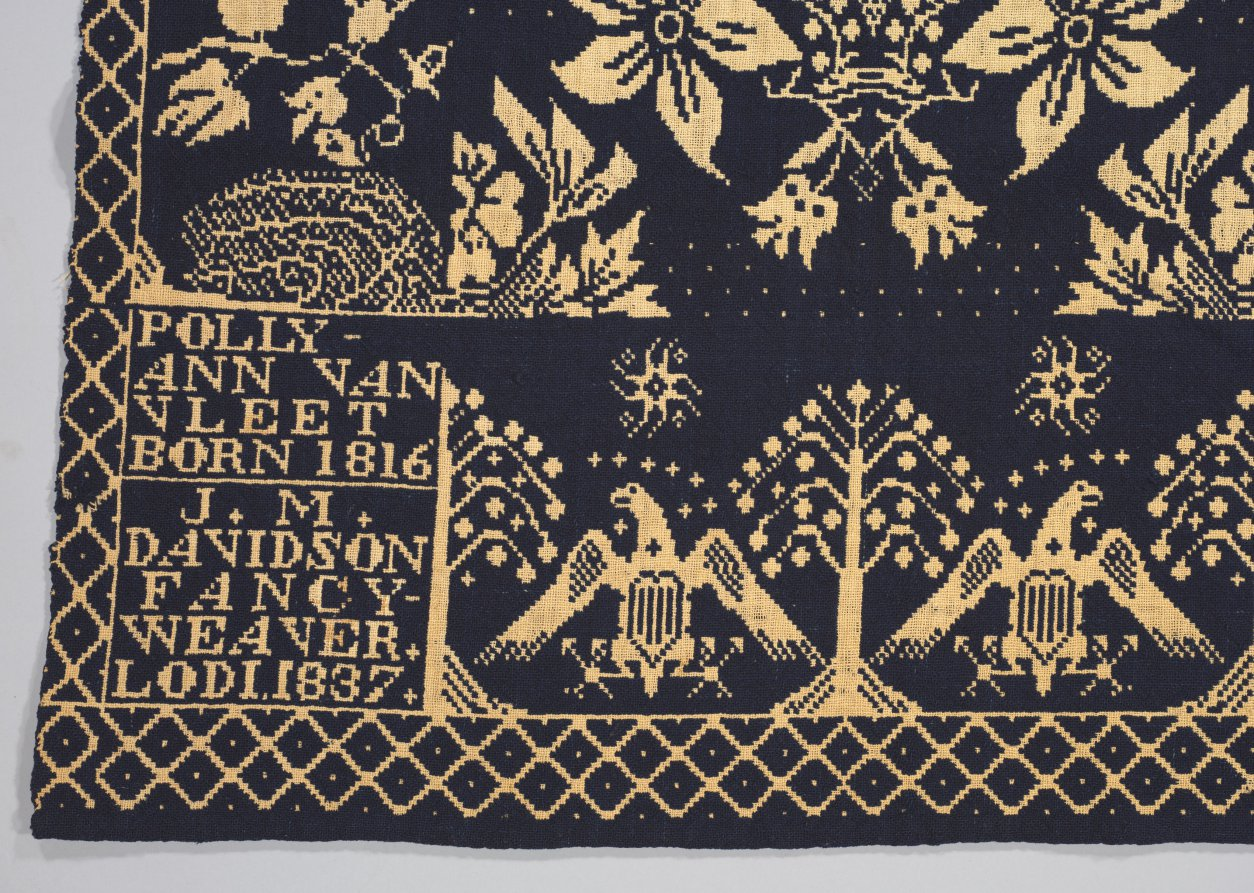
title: Coverlet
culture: America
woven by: J.M. Davidson (American)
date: 1837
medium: double weave; blue wool and white cotton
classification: Textile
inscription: Two lower corners have inwoven inscription; text in the left corner is legible, text in right corner is reversed: "POLLY - ANN VANVLEET BORN 1816 J.M. DAVIDSON FANCY - WEAVER. LODI, 1837"